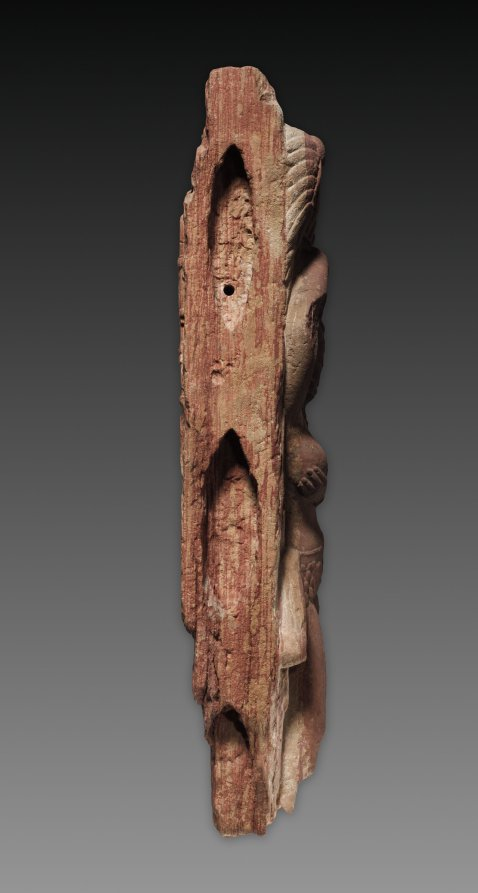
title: Railing Pillar with a Yakshi (Female Nature Divinity)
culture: Northern India, Mathura, Kushan period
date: c. 125–50 CE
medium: red sandstone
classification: Sculpture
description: This pillar would have been an upright of a stair banister, probably leading to an upper circumambulatory path of a Buddhist or Jain sacred monument known as a stupa. It has the image of a nature divinity grasping the branch of an ashoka tree with one hand and touching her breast full of nourishing milk with the other. The reverse side of the pillar is decorated with a stupa at the top and a partially damaged scene set in the architectural framework below.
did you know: Flowers of the ashoka tree (saraca asoca) are bright red.